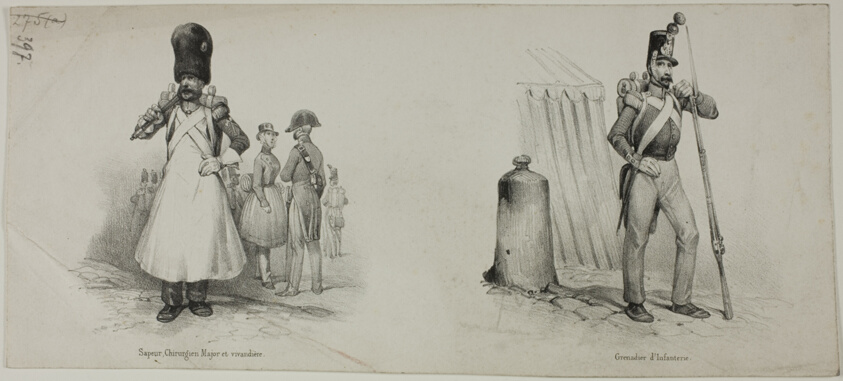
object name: Print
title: Military Costumes: Sapper (Fireman), Surgeon and Canteen Manager; Grenadier (Musketeer, Infantryman)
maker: Victor Adam; French, 1801-1866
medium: Lithograph in black on cream wove paper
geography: France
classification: lithograph; print; prints and drawing